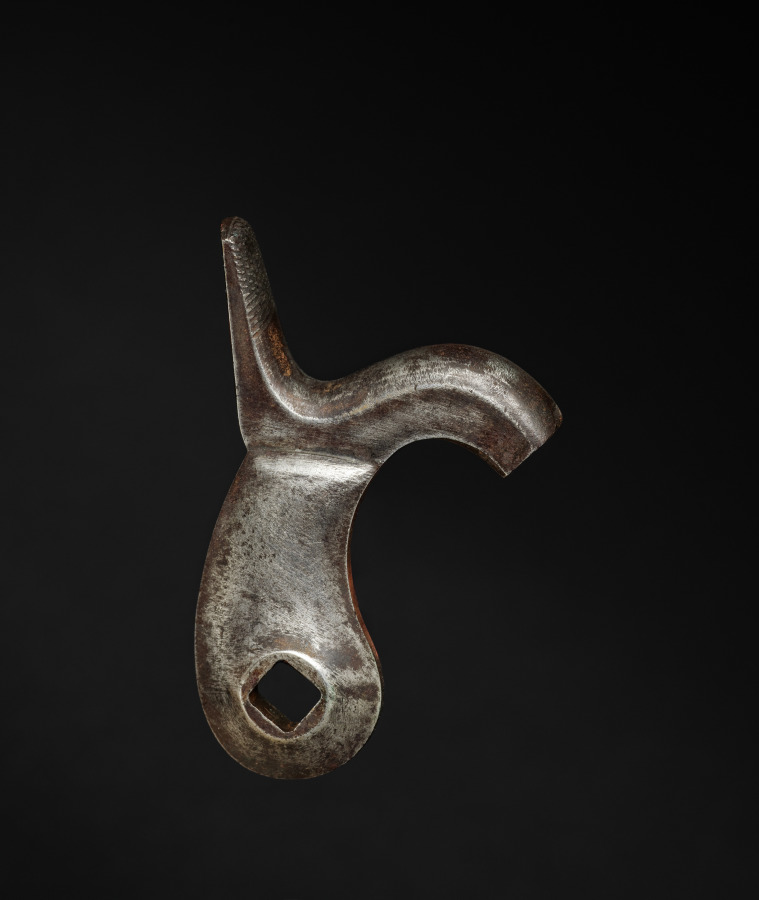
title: Gun-Lock Hammer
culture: England, early 19th century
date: c. 1800–1825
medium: steel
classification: Arms and Armor